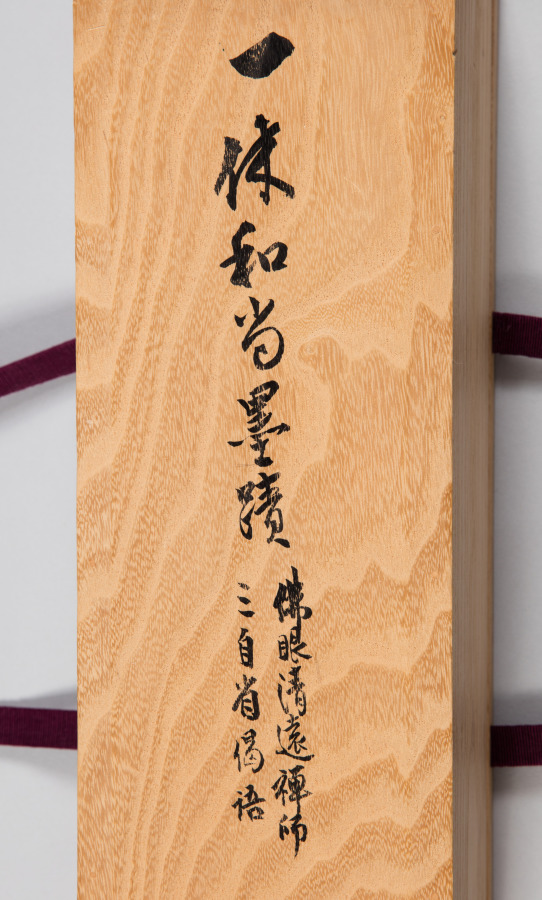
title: Reflections of Priest Foyen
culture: Japan, Muromachi period (1392–1573)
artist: Ikkyū Sōjun (Japanese, 1394–1481)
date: 1400s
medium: hanging scroll, ink on paper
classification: Painting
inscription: signed: "Kido nanasei son, Ikkyūshi Sōjun sho (Written by Ikkyū Sōjun, the seventh generation of Kido)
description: Left by his mother at a small Zen temple in Kyoto at the age of six, Ikkyu later drew on his early studies and experiences for his writings, which focused on his keen interest in the Chinese classics. Poetry in particular was a favorite subject and images from classical poetry or passages from favorite poems or commentaries frequently provided Ikkyu with the core ideas for his own work. A rare example of his calligraphy, this narrow scroll contains a verse in eight phrases, each comprising four characters. The whole verse is organized in three towering lines of brusque, emphatic calligraphy augmented by Ikkyu's signature-the two lines of running script in the lower left corner. The text refers to a passage included in the Chronicle of the Zen Sect that contains a cautionary reminder attributed to the legendary Chinese monk Foyen Qingyuan (1067-1120), long revered in Japan. The initial phrase begins: "Life is a mirage."